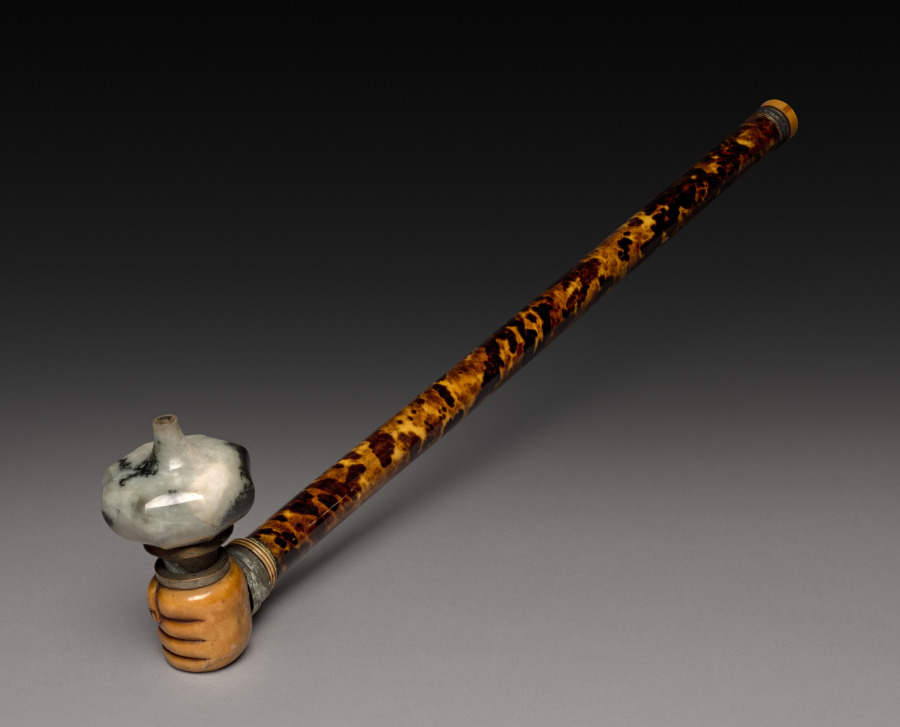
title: Opium Pipe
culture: China, Qing dynasty (1644-1911)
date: 1800s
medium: imitation tortoise-shell, ivory and jade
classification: Miscellaneous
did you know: The imitation tortoise-shell pipe has an ivory tip terminating in a clasped hand of ivory holding the jade bowl.